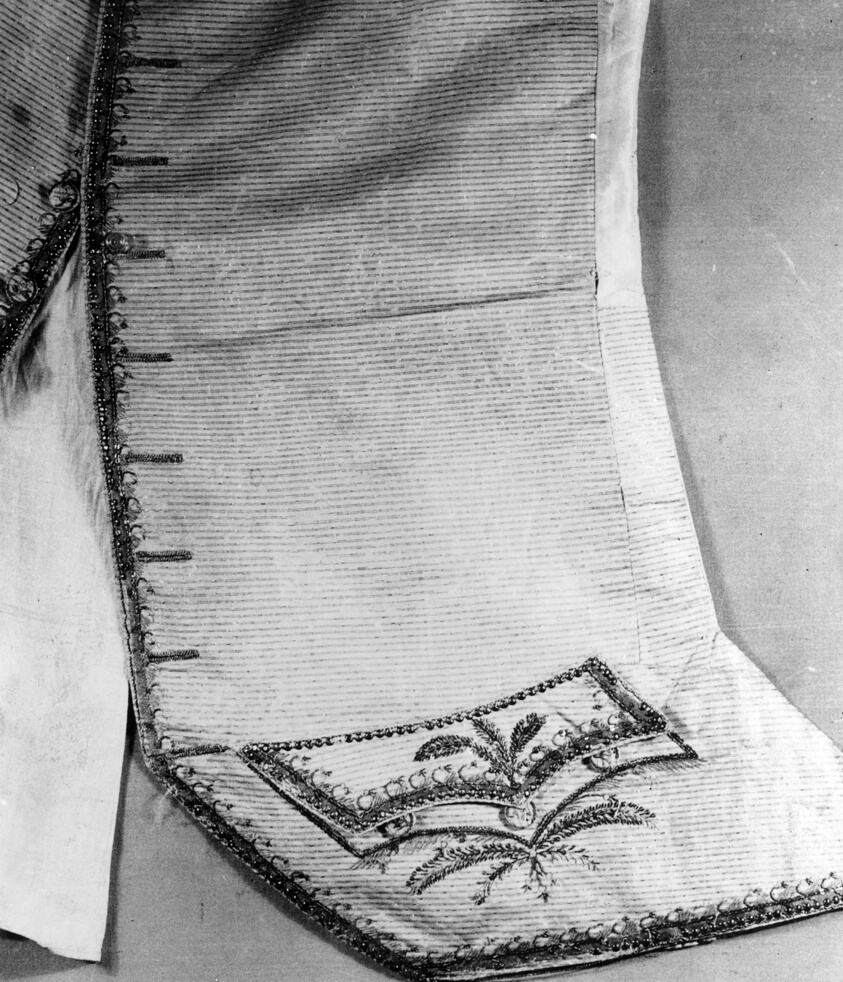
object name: Costume and Accessories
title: Waistcoat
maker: France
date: 1775/1800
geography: France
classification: textile; needlework (visual works); costume; dress (garment); clothing